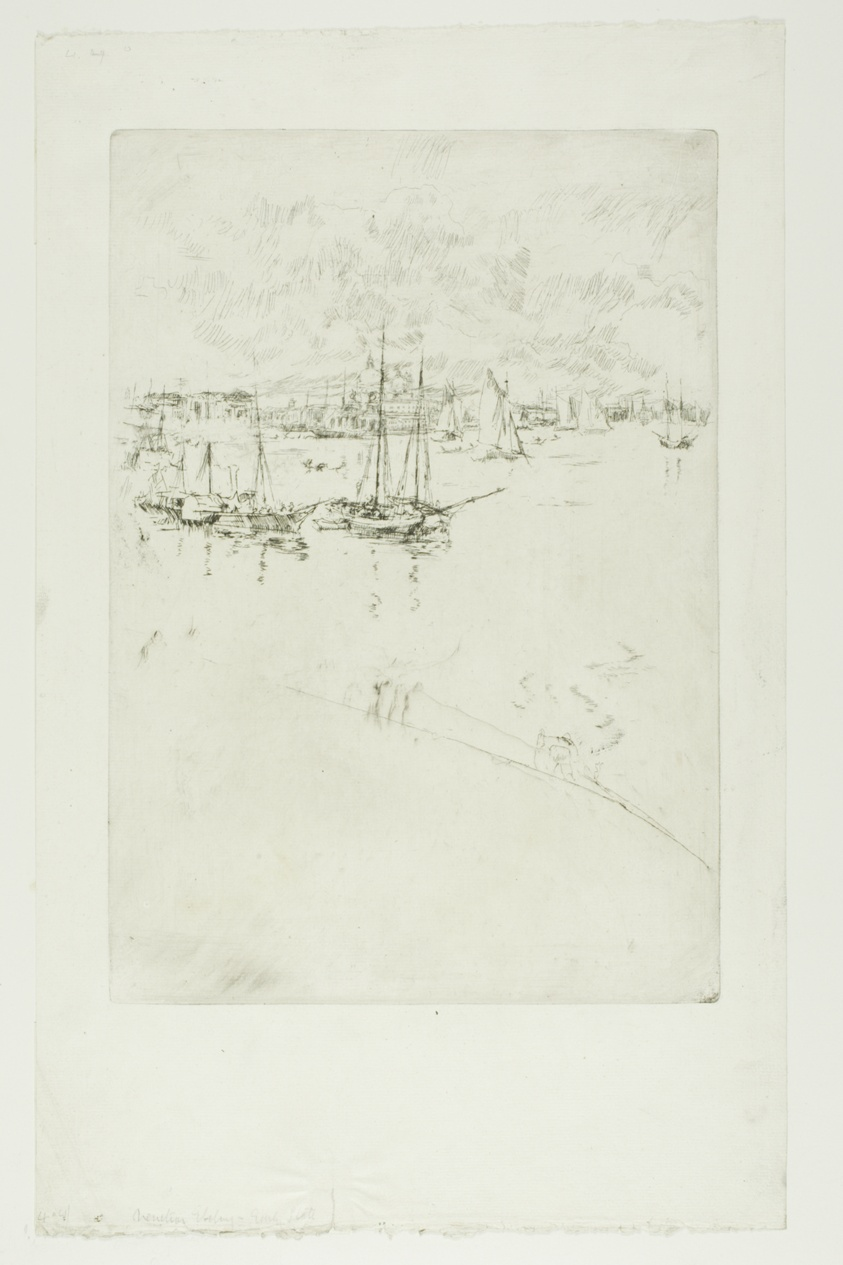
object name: Print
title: The Steamboat, Venice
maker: James McNeill Whistler (American, 1834-1903)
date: 1879/80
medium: Etching with drypoint in black ink on off-white laid paper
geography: United States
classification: etching; drypoint; print; prints and drawing; paper